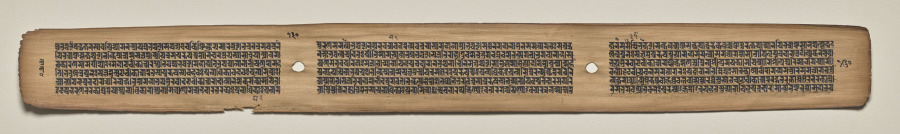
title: Text, Folio 130 (verso), from a Manuscript of the Perfection of Wisdom in Eight Thousand Lines (Ashtasahasrika Prajnaparamita-sutra)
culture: Eastern India, Bihar, Vikramashila Monastery. Painting: Nepal, Kathmandu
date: Sunday, September 14, 1119 (year 239 of the Newar Samvat in the month of Ashvina)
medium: gum tempera and ink on palm leaves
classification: Painting